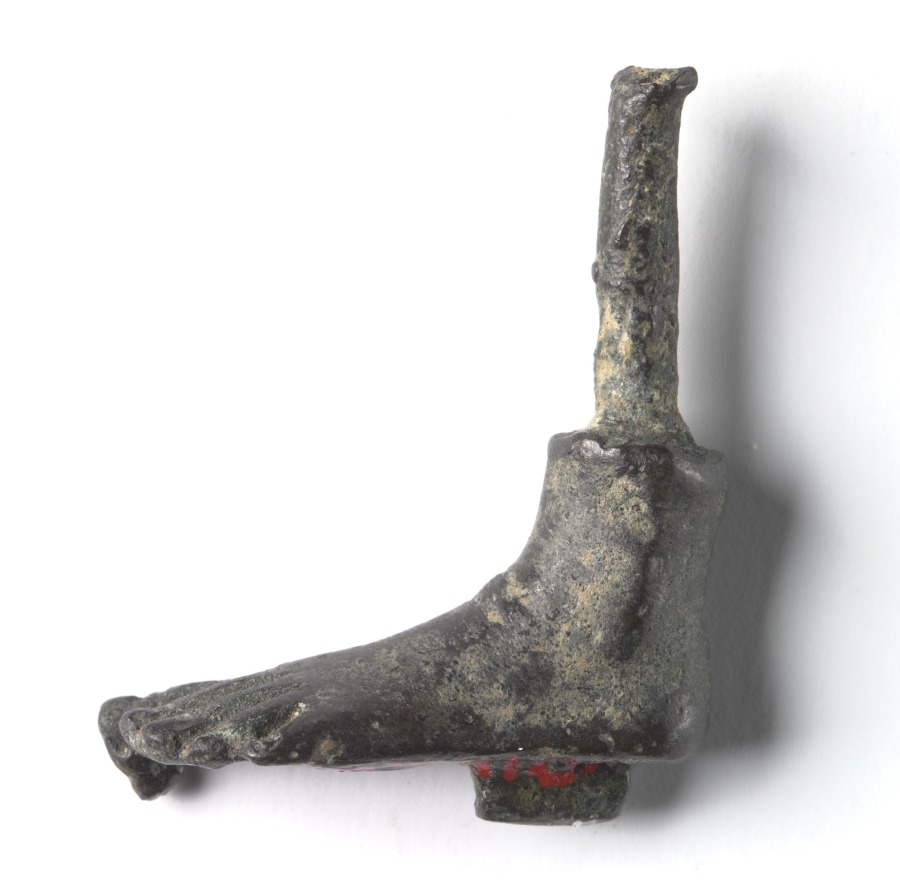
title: Bronze Mount from a "Shawabty Bundle": Left Foot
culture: Egypt, Thebes, Wadi Qubbanet el-Qirud, New Kingdom (1540–1069 BCE), Dynasties 18–19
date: c. 1336–1256 BCE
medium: bronze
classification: Funerary Equipment